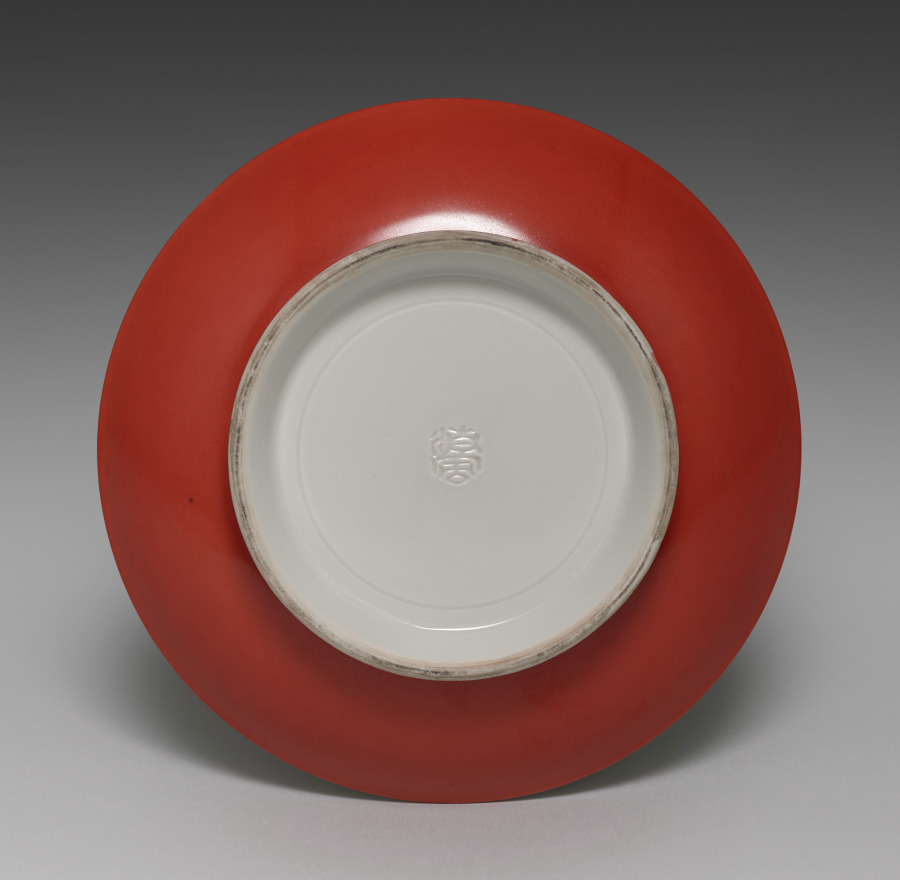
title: Dish with Carp in Waves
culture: Japan, Meiji period (1868–1912)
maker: Seifū Yohei III (Japanese, 1851–1914)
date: 1893–1914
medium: Porcelain with incised designs, iron oxide, and red glaze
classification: Ceramic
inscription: 清風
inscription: 清風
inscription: 清風盧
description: The exterior of this low, wide dish with flared foot is covered with a red coral glaze. Its interior is white with incised designs, and the rim is decorated with brown iron oxide. The primary design occupies the flat bottom of the bowl and is bound within a single band. It is of a carp swimming vigorously against roiling waves with frothy crests moving in multiple directions; the water just above the fish’s head is beginning to form a whirlpool. A closer look at the fish’s face reveals that it somewhat resembles that of a dragon. It is possible that the motif is meant to be a carp who jumps over the waterfall and transforms into a dragon, who flies into the sky. The iconography symbolizes the transformative experience of striving to one’s utmost and achieving the impossible against tough odds. Originating in China, the narrative’s visual representation as well as its meaning crossed the ocean to Japan, where it often appeared on items gifted to those celebrating pivotal successes in life, such as obtaining elevated status in one’s work or graduating from an academic program.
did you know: The inside walls of the bowl are decorated with three abstract flowers, each represented with five circles ringing a central circle, from which leafy tendrils stretch in both directions .